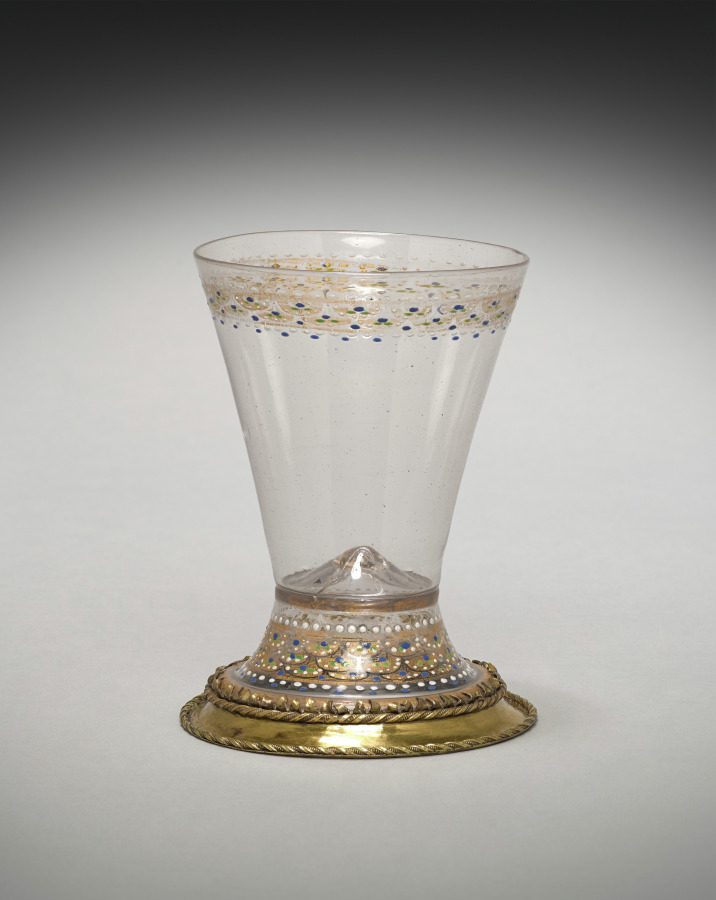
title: Beaker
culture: Italy, Venice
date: c. 1490–1500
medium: glass, enameled and gilded, gilt-silver mounts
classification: Glass